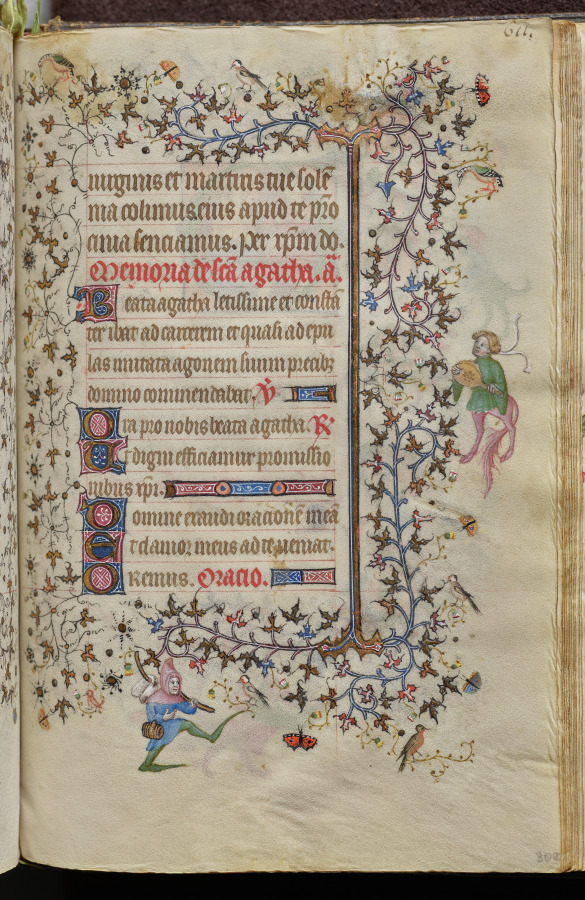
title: Hours of Charles the Noble, King of Navarre (1361-1425): fol. 300r, Text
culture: France, Paris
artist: Master of the Brussels Initials and Associates (French)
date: c. 1405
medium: ink, tempera, and gold on vellum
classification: Bound Volume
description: This precious volume was obviously highly prized by its owner, the French-born King of Navarre, who had his coat of arms painted on no less than twenty folios. Rather than directly commissioning this manuscript from a specific workshop, it seems that Charles the Noble acquired his book of hours -- perhaps ready-made for the luxury market -- while on a trip to Paris in 1404-05. A collaborative effort, six painting styles are evidenced within the pages of this codex, those of two Italians, two Frenchmen, and two Netherlanders. The painter who was responsible for the planning and decoration of the book, and who produced seventeen of the large miniatures, was a Bolognese artist known as the Master of the Brussels Initials. His principal assistant, responsible for most of the borders, was a Florentine who signed his name "Zecho" da Firenze on folio 208 verso.